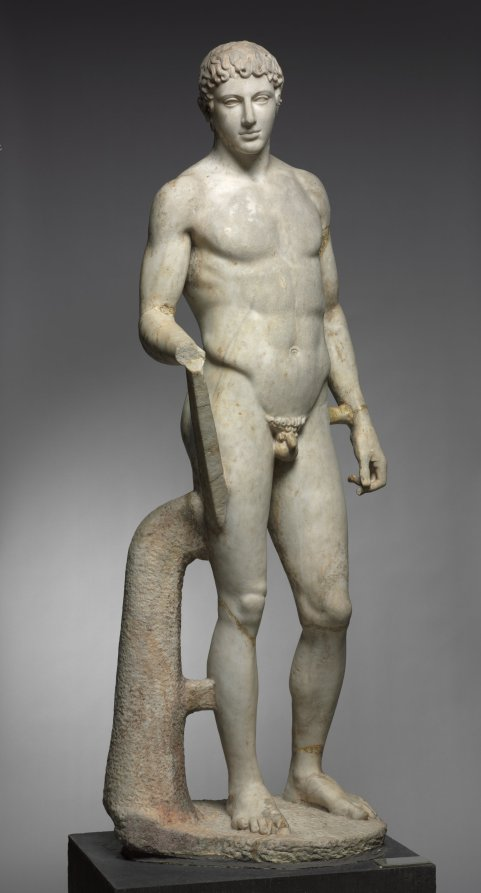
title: Statue of an Athlete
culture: Italy, Roman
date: 1–100 CE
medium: marble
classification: Sculpture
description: This idealized athlete recalls Greek sculptural types invented and popularized during the 400s BC. Large-scale athletes and other sculptures like this were originally created by famous artists as sanctuary dedications. Centuries later, they were widely copied and adapted by Roman sculptors, whose clients sought their own versions of earlier masterpieces. Working in marble rather than bronze, these sculptors added certain elements for stability, such as the struts and the large tree trunk beside the right leg here. Sculptures like this one are profoundly complex, made by and for Romans but descended from Greek ancestors.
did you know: For many years, this sculpture stood in the rotunda of the Cleveland Museum of Art.